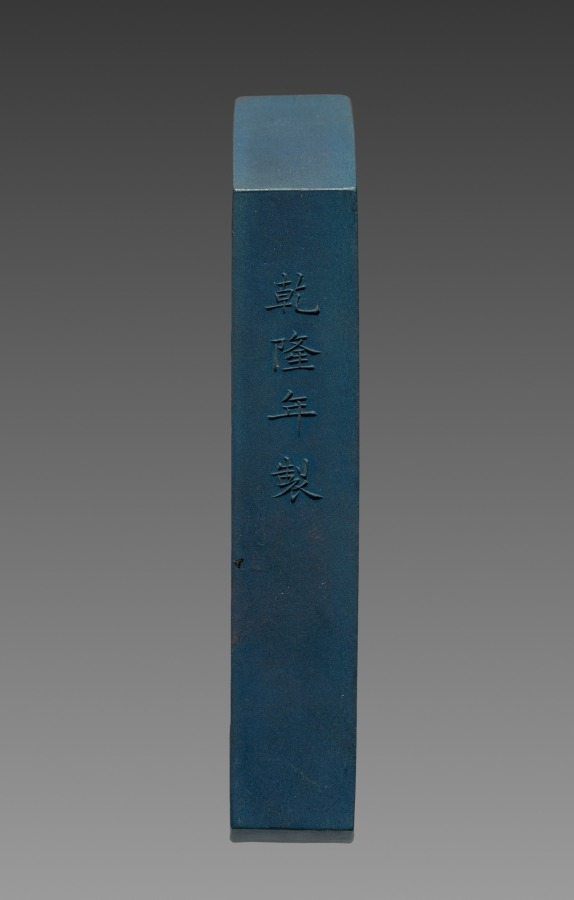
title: Ink Stick from an Imperially Commissioned Set of Ink Stick with Images and Poems of Famous West Lake Sites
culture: China, Qing dynasty (1644–1911), Qianlong reign (1736–95)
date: 1780–94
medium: Molded ink in blue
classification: Miscellaneous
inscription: 乾隆年製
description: This is one of ten ink cakes of different shapes and colors stored in an exquisite lacquer box. Each is inscribed in gold with a poem by the Qianlong emperor, praising the ten famous sights of the Westlake in Hangzhou, near Shanghai. The Westlake is famous for its natural beauty; it was a favorite imperial destination and remains a tourist attraction today. Ink cakes (also called ink sticks) are dissolved with the addition of water and ground on the surface of a flat stone into liquid ink for painting and calligraphy. The precious ink cakes here, however, have never been used.